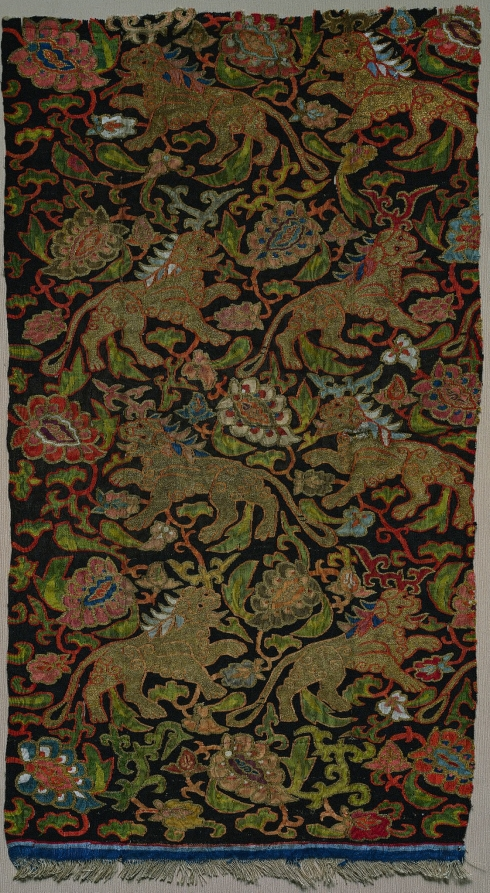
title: Tapestry with golden lions and palmettes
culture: Central Asia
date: 1200s or earlier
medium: silk, gold thread; tapestry weave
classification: Tapestry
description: This reversible tapestry (kesi) fragment, woven with silk and metal thread, is a section from yardage likely intended for a garment, but no contemporary paintings exist to confirm this. A fringe of warps and a striped starting edge are preserved at the bottom of this fragment, as is a selvage along the left edge. Iranian golden lions, traditional symbols of royalty, are depicted amid large palmette leaves on vines. This kesi is different from other Central Asian silk kesi in the repetition of lions and palmettes in horizontal rows, facing alternate directions in an asymmetrical Chinese-inspired layout. But the depiction of lions with parted manes and tilted heads dates from the Sasanian dynasty of Iran (226–637 CE). The palmettes are common to both the Iranian world and Central Asia. This kesi may have been woven by Uyghurs living in the vicinity of Khotan, where the influence of Iranian culture was strong.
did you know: Dye analysis has been done on some of the colored yarns in this fragment. The orange, scarlet, and pink dye comes from the safflower plant, the red and darker pink dye from the bark of a small evergreen tree called the China brasiliensis, and the blue dye from the indigo plant.